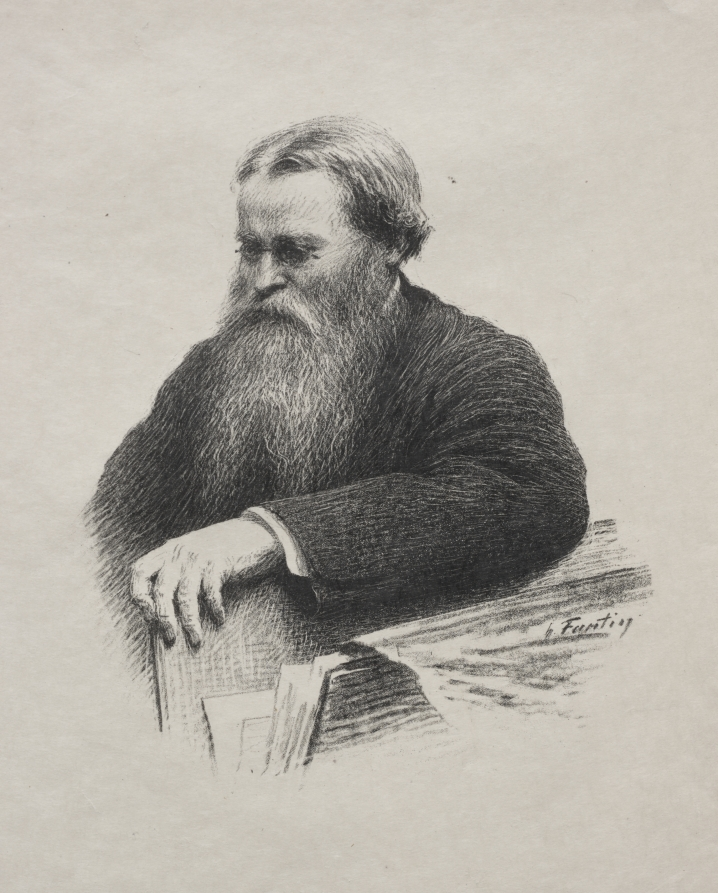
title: Edwin Edwards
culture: France, 19th century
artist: Henri Fantin-Latour (French, 1836–1904)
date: 1892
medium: lithograph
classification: Print